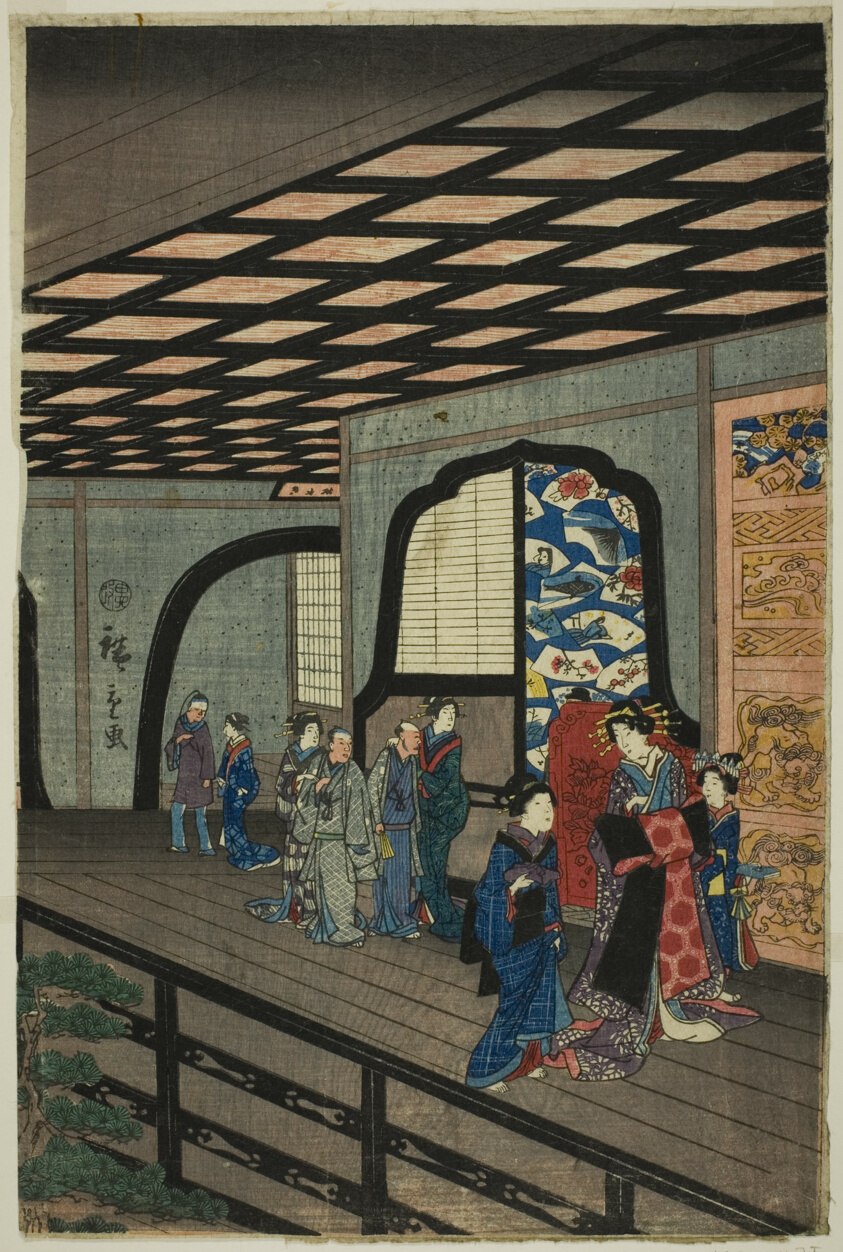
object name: Print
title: Upper Floor of the Gankiro in Yokohama (Yokohama Gankiro age)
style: Japanese (culture or style)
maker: Utagawa Hiroshige II (Shigenobu) (Japanese, 1826–1869)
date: 1860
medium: Color woodblock print; left sheet of oban triptych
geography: Japan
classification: woodblock print; print; asian art